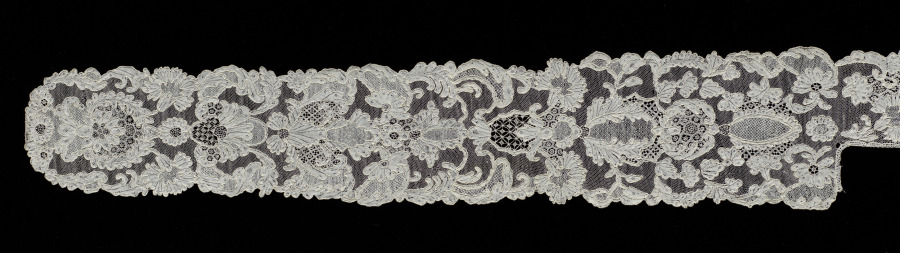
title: Lace Lappets and Edging for Cap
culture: France, Alençon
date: 1700–1715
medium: Needle lace (Point d'Alençon)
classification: Lace